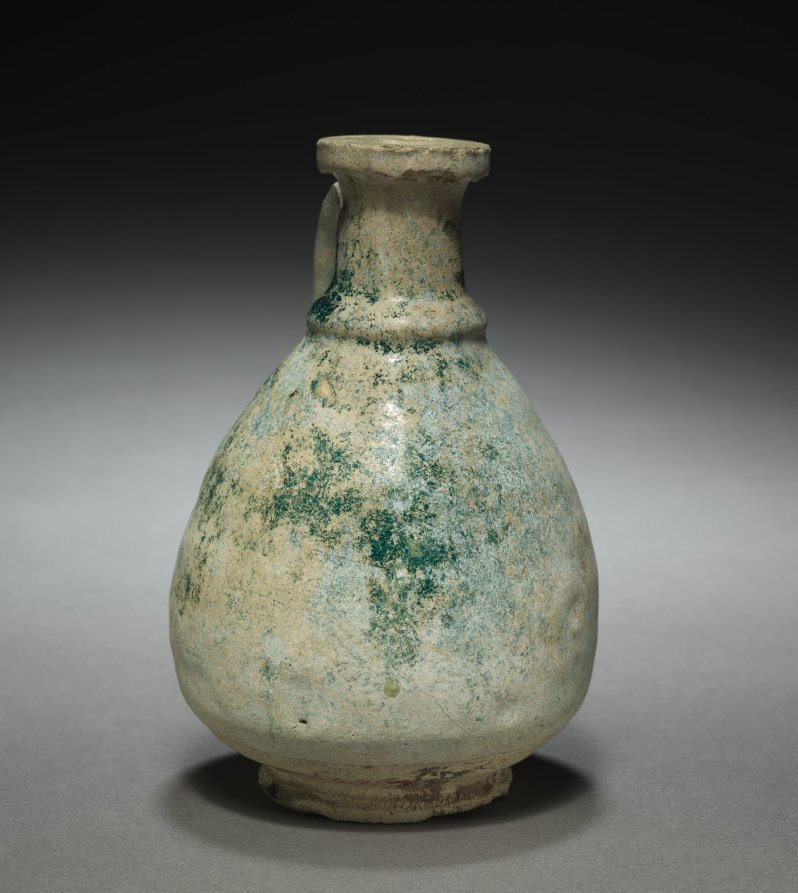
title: Jar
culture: Parthian Empire (247 BCE–224 CE)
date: 1–200 CE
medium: earthenware with weathered glaze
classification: Ceramic